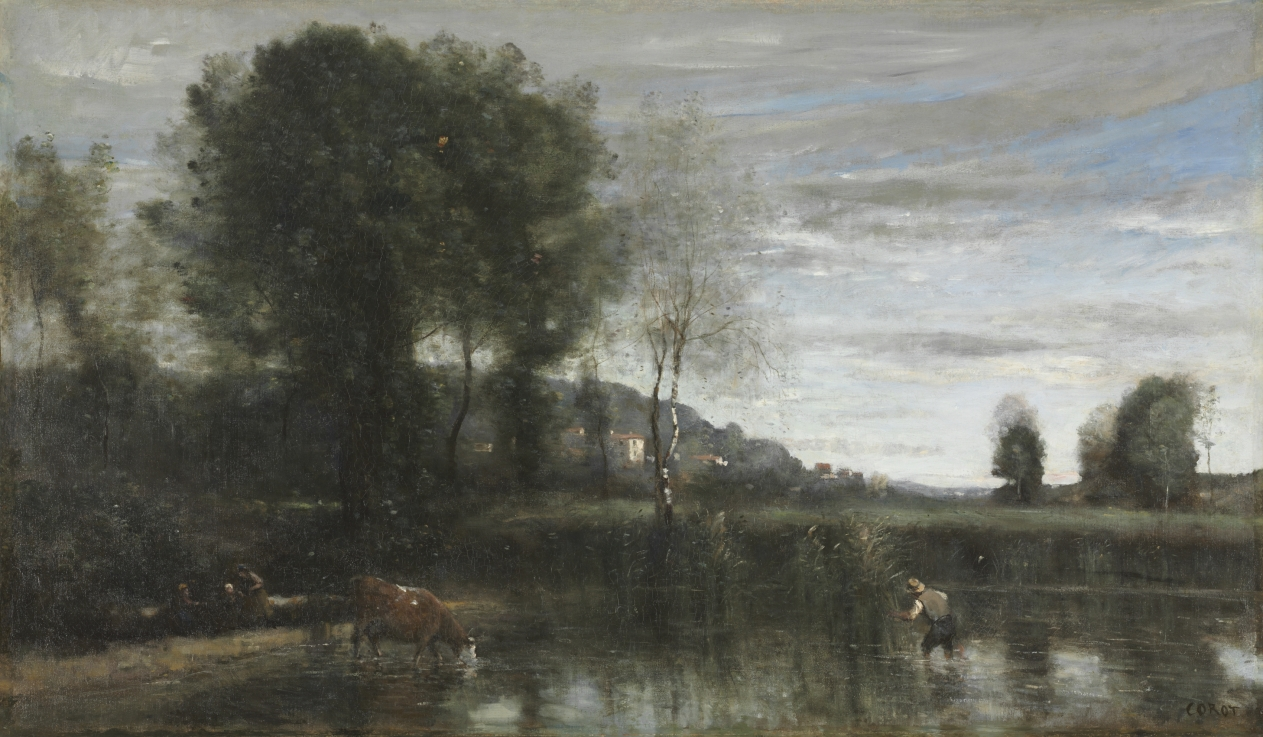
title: Pond at Ville-d'Avray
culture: France, 19th century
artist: Jean Baptiste Camille Corot (French, 1796–1875)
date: late 1860s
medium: oil on fabric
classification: Painting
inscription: Signed in black paint lower right corner: corot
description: Corot painted this view of a pond near his home at Ville-d'Avray, just west of Paris, in his late style distinguished by soft, hazy forms and gentle, silvery light. Such paintings merge his lifelong study of nature with nostalgic memories and contrast sharply with the more formal compositions and precisely rendered shapes of his early landscapes. Corot's devotion to the direct study of nature was a major influence on the Impressionists.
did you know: The dreamlike quality of the painting reflects Corot’s desire to reproduce the “first Impression” of the landscape.